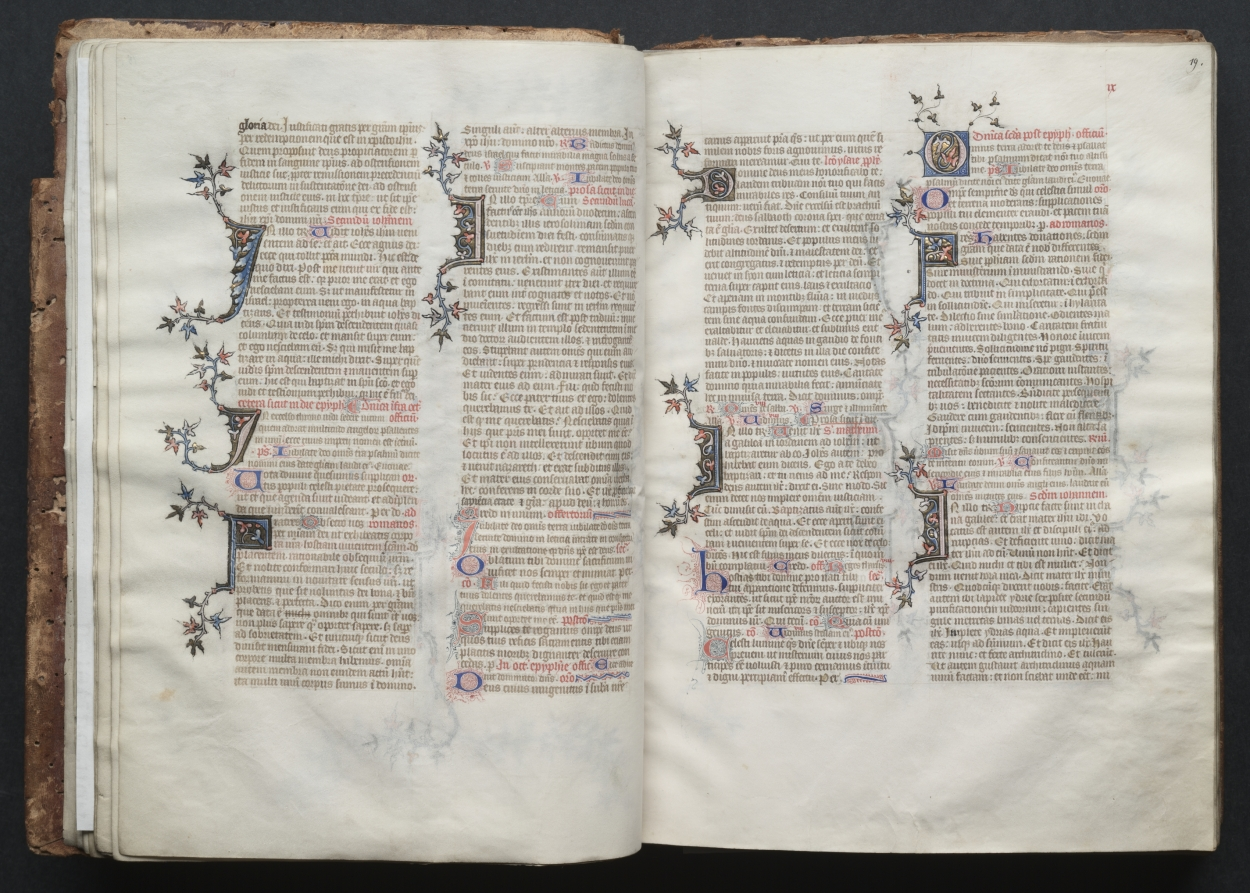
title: The Gotha Missal: Fol. 19r, Text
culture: France, Paris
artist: Master of the Boqueteaux (French)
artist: and Workshop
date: c. 1375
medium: ink, tempera, and gold on vellum; blind-tooled leather binding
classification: Bound Volume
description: The style and quality of this manuscript's decoration is typical of deluxe Parisian books made for aristocratic or royal patrons. Most of the book's decoration appears to be the work of the Master of the Boqueteaux, an artist active at the court of King Charles V (died 1380). His style was apparently shared by a number of book illuminators working in and around Paris. It is very possible that the Gotha Missal belonged to Charles V, but is not provable because the manuscript has no royal portraits and lacks a colophon. Given the book's magnificent decoration, however, it would seem that it was produced for a Valois prince, if not for the king himself. The manuscript receives its name from the German dukes of Gotha, its later owners.